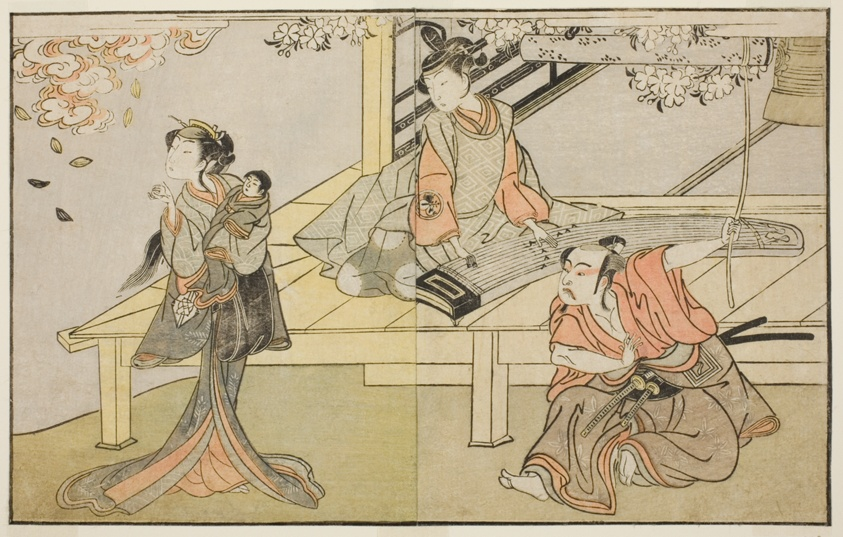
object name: Print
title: The Actors Ichikawa Yaozo II as Yoshimine no Munesada (right), Yoshizawa Sakinosuke III as Shizuya (center), and Nakamura Matsue I as Sakuragi (left), in the Play Kuni no Hana Ono no Itsumoji, Performed at the Nakamura Theater in the Eleventh Month, 1771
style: Japanese (culture or style)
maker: Katsukawa Shunsho 勝川 春章; Japanese, 1726-1792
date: c. 1772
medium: Color woodblock print; from the illustrated book Yakusha Kuni no Hana (Prominent Actors of Japan)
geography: Japan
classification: woodblock print; print; asian art